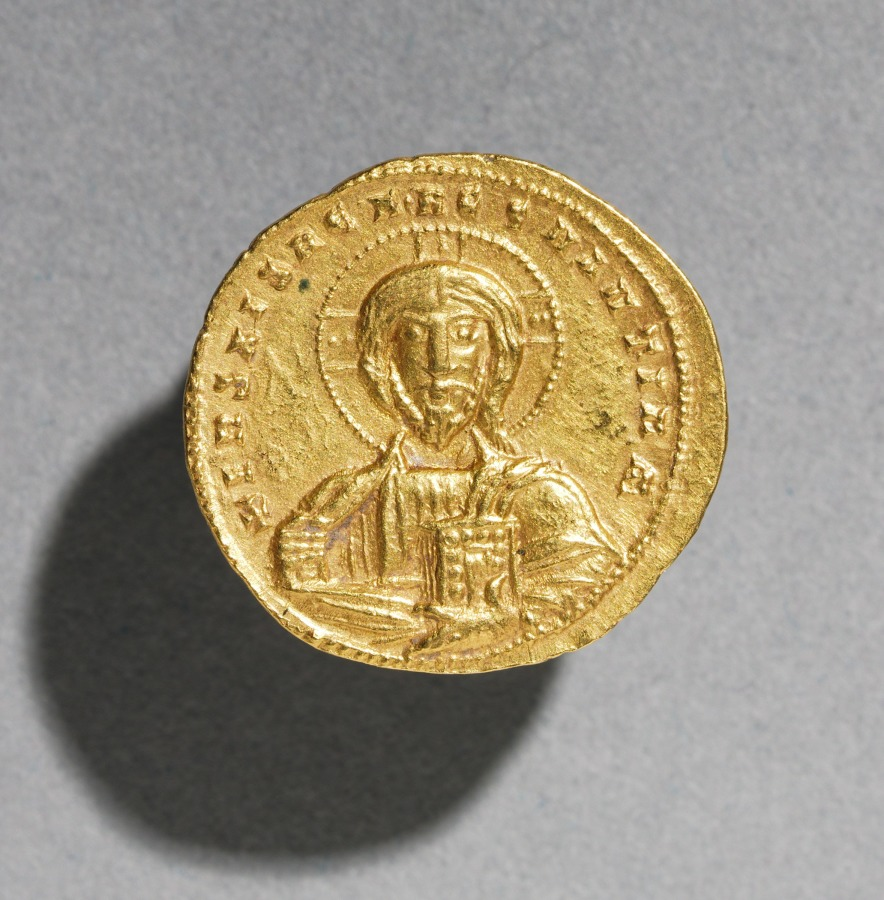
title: Nomisma with Nicephorus II Phocas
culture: Byzantium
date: c. 963–969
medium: gold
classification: Coins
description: Byzantine Gold Coins The vast number of surviving Byzantine coins attests to the level of trade across the empire. Controlled and supervised by the emperor, the producers of coins took care to represent his authority and reflect his stature. Talented artists were recruited to engrave the dies (molds) used for the striking of coins. Emperors increasingly came to include their heirs and co-emperors on their coinage, as well as other family members or even earlier rulers. Coins were recognized, then as now, as small, portable works of art. With their inscriptions and images, Byzantine coins provide valuable documentation of historical events and a record of the physical appearance of the emperors. The coins shown here include the solidus, the basic gold coin of 24 karats; the tremissis, a gold coin of one-third the weight and value of the solidus; and the nomisma, which in the 10th century replaced the solidus as the standard gold coin.